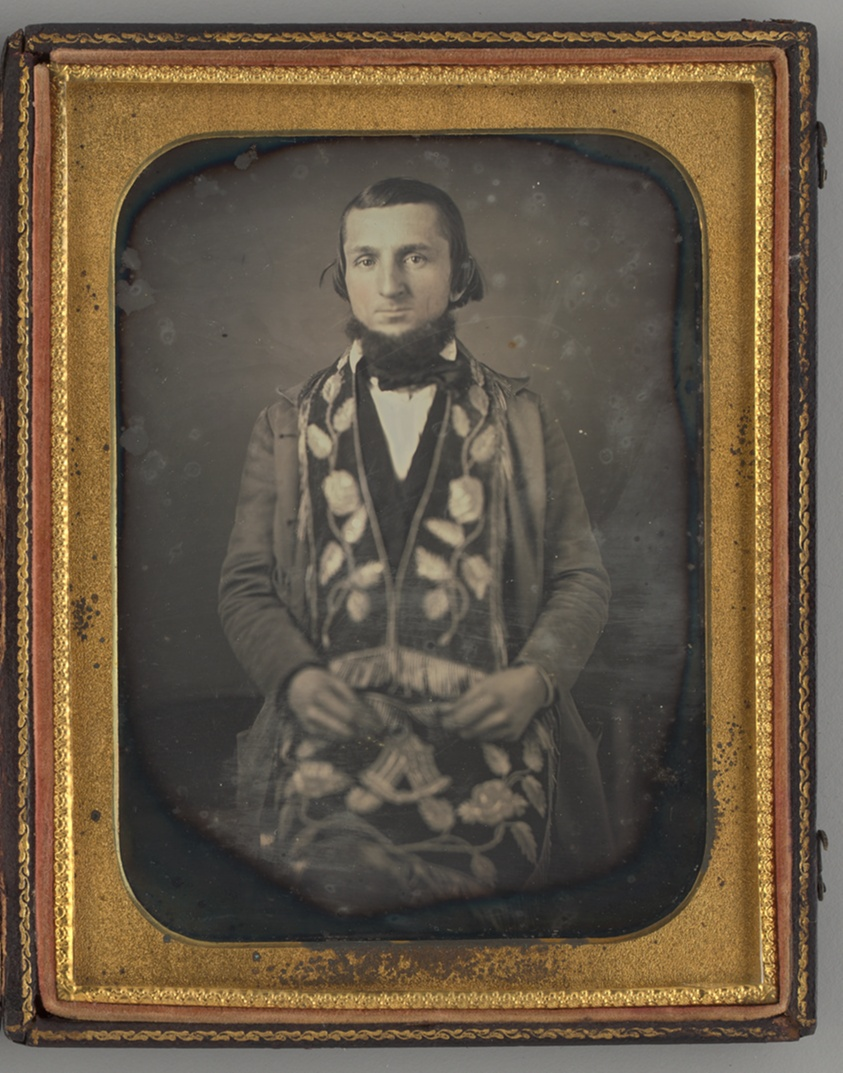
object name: Photograph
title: Untitled (Portrait of a Seated Man)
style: 19th century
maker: Unknown maker; American, 19th century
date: 1852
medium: Daguerreotype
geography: United States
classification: portrait; photography; photographic process; photograph; daguerreotype; portrait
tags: lundberg collection, men, Male, portrait, portraits, portraits: male subject